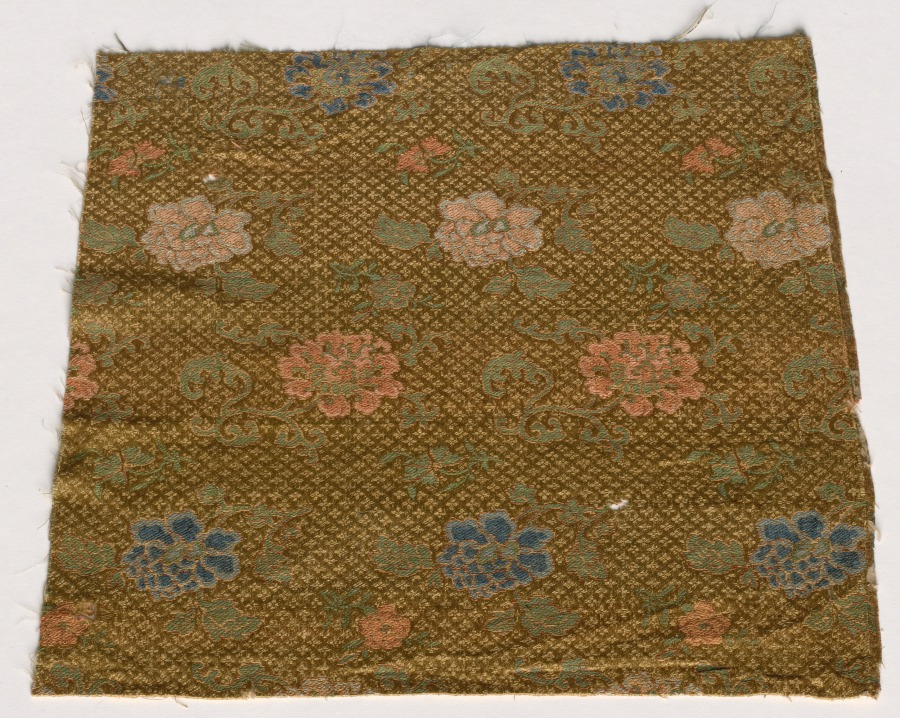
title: Silk Damask Fragment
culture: China, Qing dynasty (1644-1911)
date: 1800s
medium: silk, damask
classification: Textile